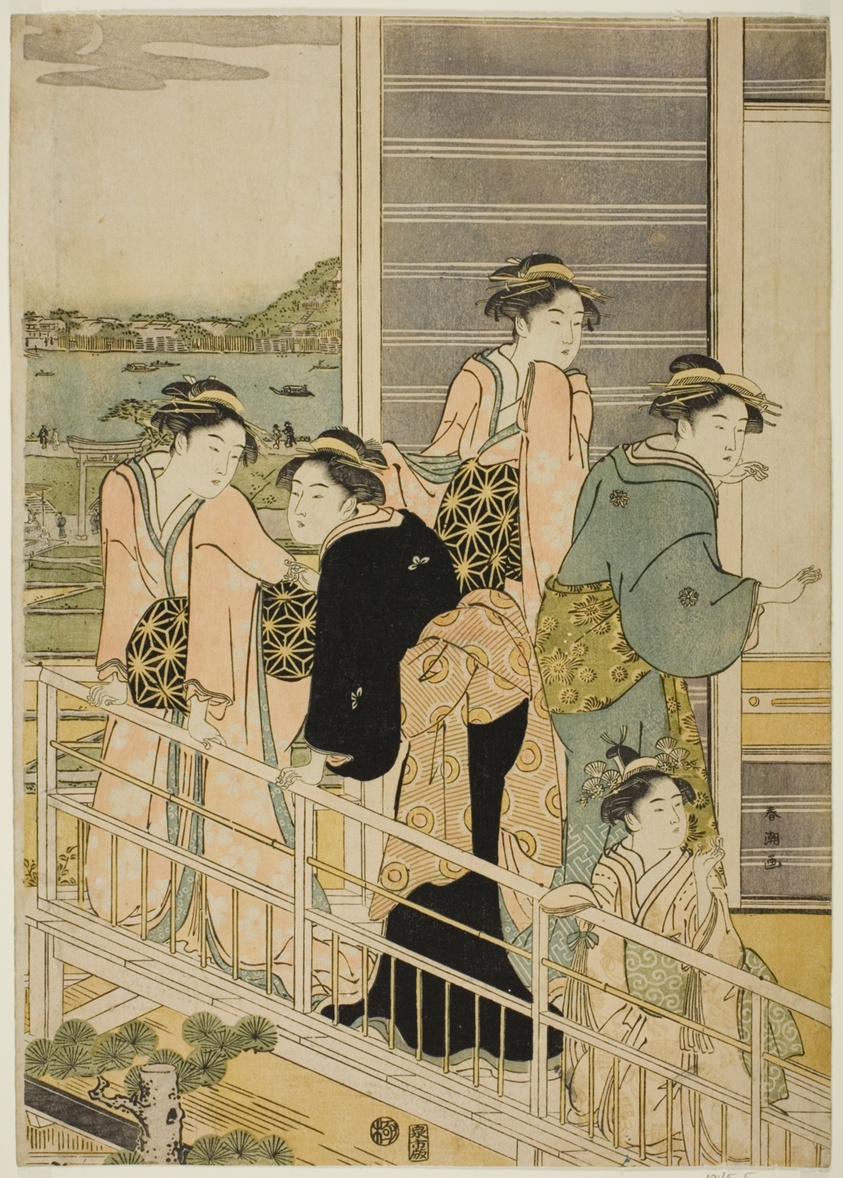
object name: Print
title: Women on a Balcony of a Yoshiwara Teahouse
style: Japanese (culture or style)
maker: Katsukawa Shuncho; Japanese, active c. 1780-1801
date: c. 1780s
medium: Color woodblock print; left sheet of oban triptych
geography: Japan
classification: woodblock print; print; asian art